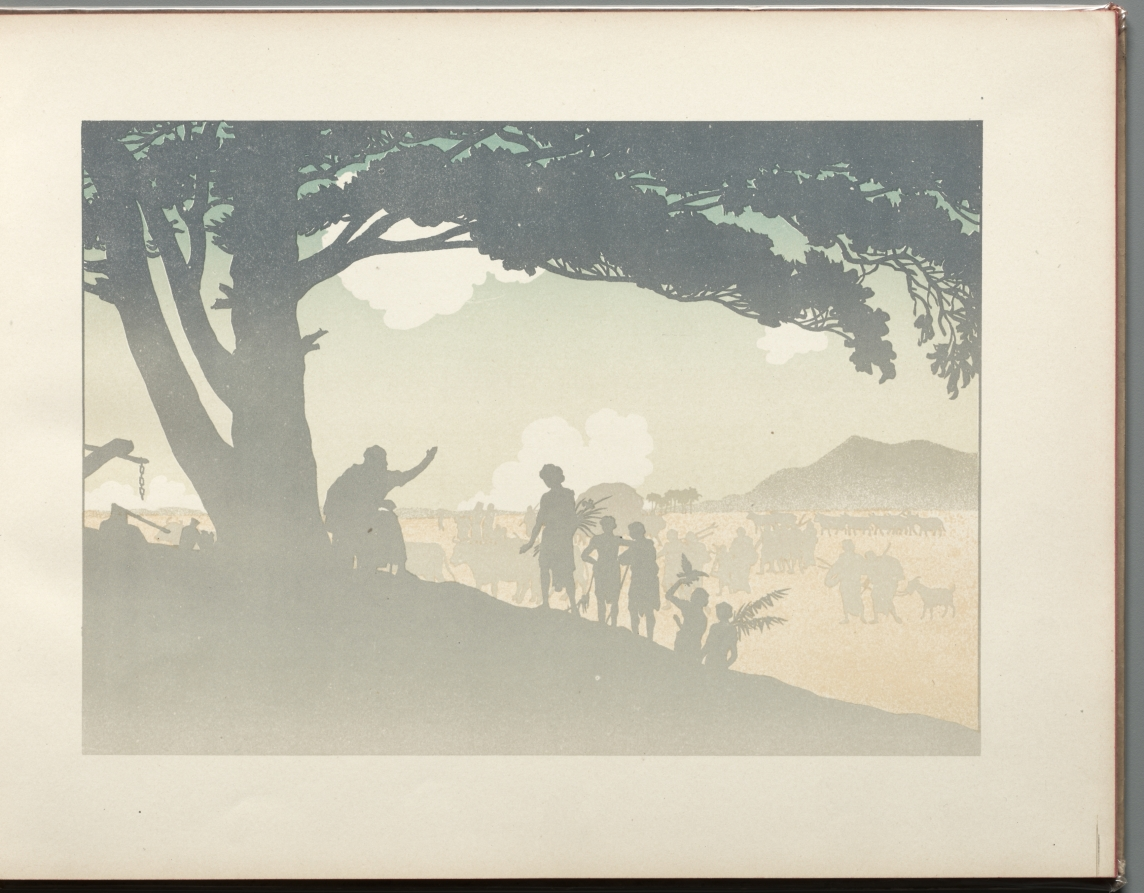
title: The Prodigal Son: page 11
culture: France, 19th century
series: Bound Volume illustrating the poetry and music of Georges Fragerolle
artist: Henri Rivière (French, 1864–1951)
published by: E. Flammarion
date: 1895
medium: 15 color lithographs in a bound volume illustrating the poetry and music of Georges Fragerolle: color lithograph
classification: Bound Volume